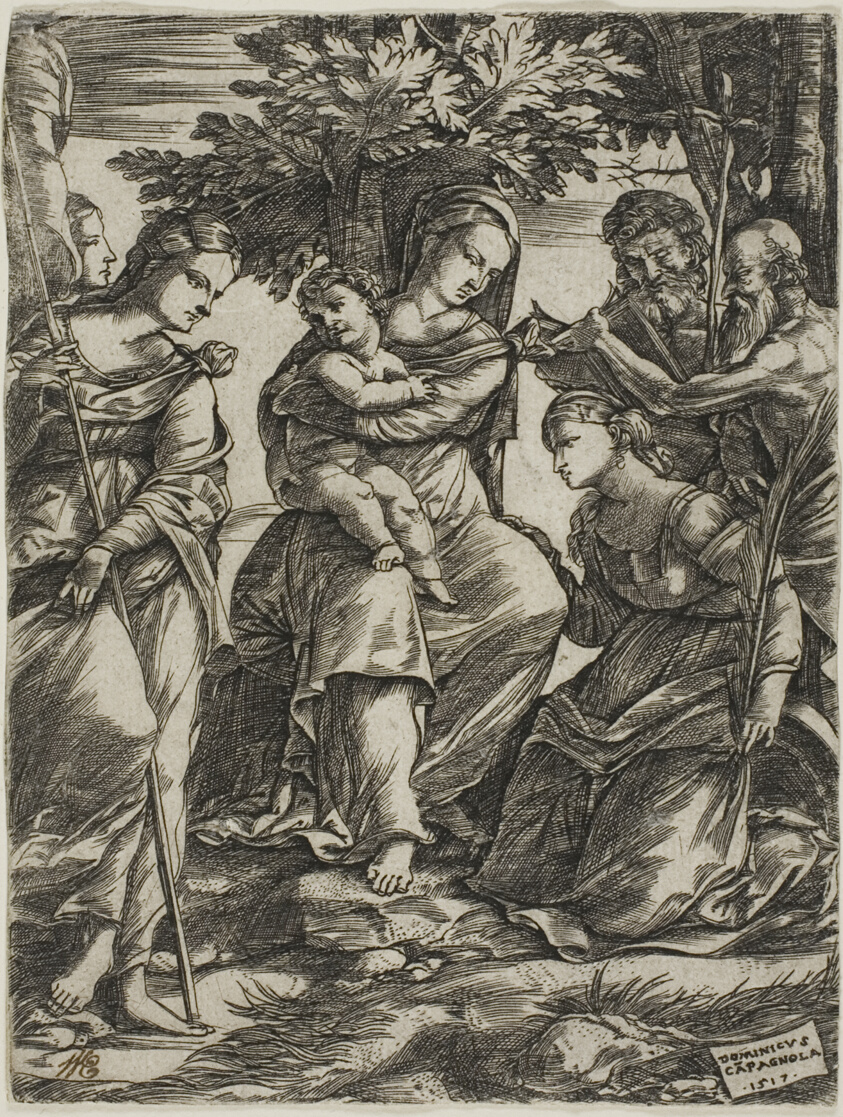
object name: Print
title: Virgin and Child with Saints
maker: Domenico Campagnola (Italian, c. 1500-1564)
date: 1517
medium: Engraving in black on ivory laid paper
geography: Italy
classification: print; prints and drawing